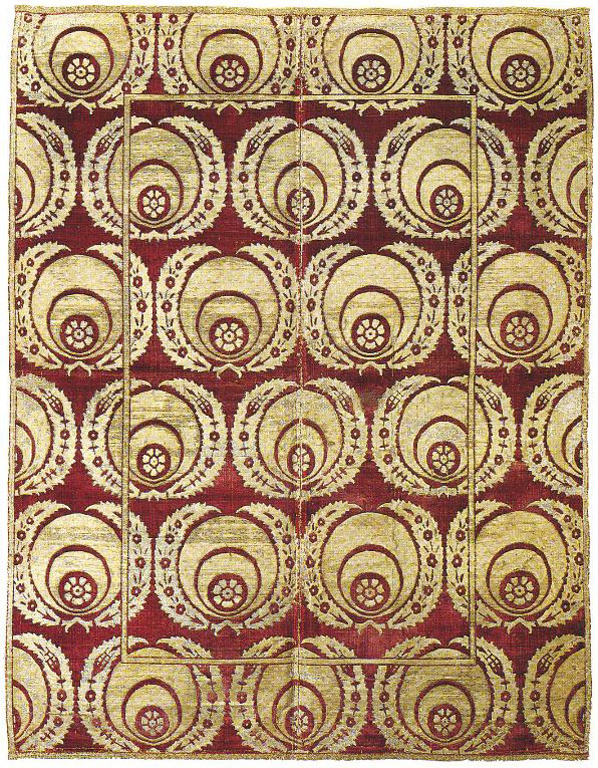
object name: Coverings and Hangings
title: Cover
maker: Bursa, Turkey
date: 1575/1600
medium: Silk and gilt-metal-strip-wrapped silk, satin weave with brocading wefts, cut voided velvet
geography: Turkey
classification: textile; weaving - velvet